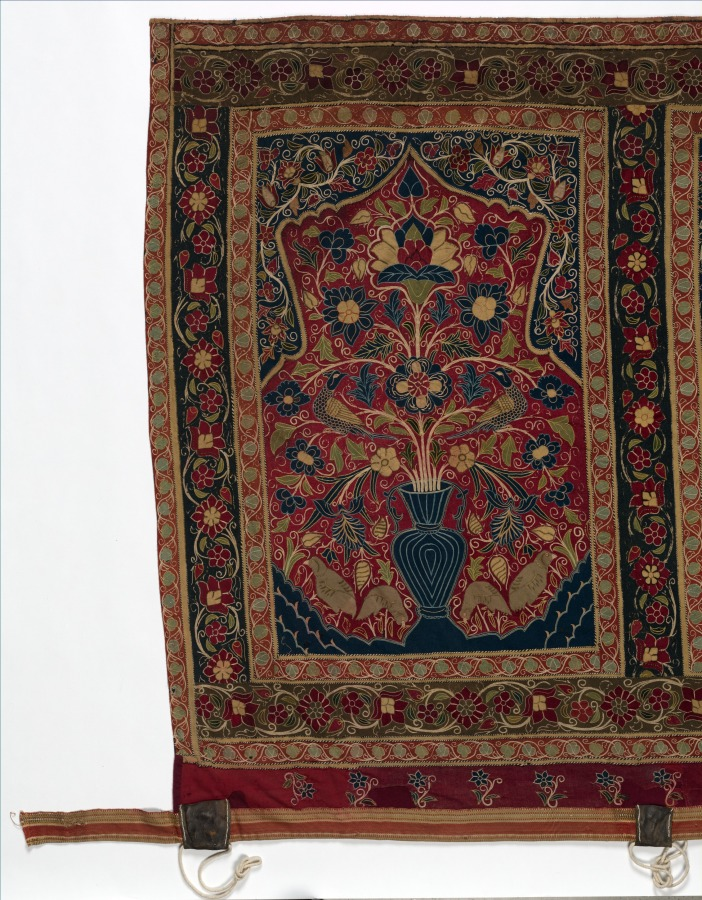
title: Royal Round Tent made for Muhammad Shah (wall panel with three design units)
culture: Iran, Rasht, Qajar period (1779-1925)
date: 1834–48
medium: Wool with silk embroidery (chain stitch), rope, cotton, leather, tape; Rasht work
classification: Textile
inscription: Inscriptions: The central design unit of this wall panel has two embroidered inscriptions. 1. Upper inscription (center of the top blossom): "Muhammad shah sultan-e ghazi."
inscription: 2. Lower inscription (on the base of the vase): "Kamtarin bandeh-ye dargah fath'ali."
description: Royal tents were potent symbols of authority, wealth, and power throughout the greater Middle East. Rulers owned thousands of tents. They were used for shelter, shade, and innumerable functions in tent compounds that were essential for imperial ceremonies, travel, and military campaigns. Distinguished by size with elaborately decorated interior walls and ceilings, tents could be as large as castles. Opulent tents were also presented as imperial gifts. Tents are only known through documents before 1600. For example, in Baghdad in 809, Caliph Harun al-Rashid owned 4,000 ceremonial tents and 150,000 camping tents that were stored in the imperial Abbasid treasury. An astonishing variety and quantity of tents were housed in the royal Fatimid tent storeroom in Cairo in 1068-69, including "military tents, fortress tents, and castle tents, manufactured of . . . gold-brocaded stuff embroidered with designs of elephants, wild beasts, horses, peacocks, birds." Since 1600, Ottoman Turkish tents with elaborate floral decoration have been preserved in Istanbul in the Topkapi Palace Museum and Military Museum, and in European collections as war booty, primarily from the Ottoman Turks' attempt to conquer Vienna in 1683. These tents are not done in the Rasht technique, but rather are applique. In contrast, royal tents from Iran are extremely rare. This spectacular ceremonial tent is embroidered with the name of its owner, Muhammad Shah, who ruled Iran from 1834 to 1848 during the Qajar dynasty. The radiant jewellike interior features exuberant flora, blossoming vines, and robust birds made with colored wool embellished with silk-thread embroidery.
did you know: Rasht work is named after the city on the Caspian Sea in present-day Iran, which was a major silk trade center with numerous textile workshops.